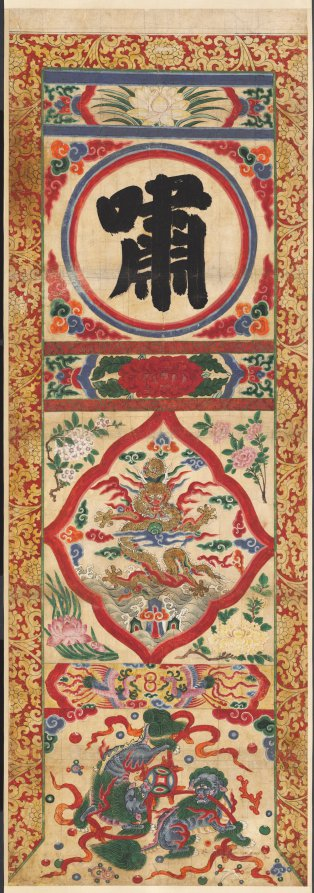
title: Painted Panel of Character "Whistle"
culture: Korea, Joseon dynasty (1392–1910)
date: early 1900s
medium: hanging scroll, ink and color on paper; unmounted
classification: Painting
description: This set of four colorful hanging scrolls may have been used in an outdoor Buddhist ritual to evoke heavenly blessings. Each hanging scroll bears four different character; tiger, dragon, whistle, and recite. Traditionally, tiger and dragon belong to the four directional guards, respectively west and east.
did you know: This set of four colorful hanging scrolls may have been used in an outdoor Buddhist ritual to evoke heavenly blessings.